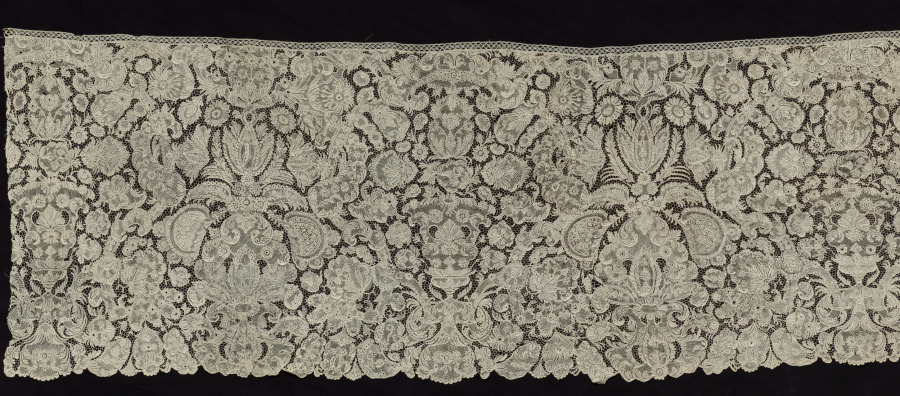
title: Lace Panel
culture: France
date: 1740–50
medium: Silk or cotton: needle lace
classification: Lace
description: The motifs in this lace panel were created separately and then joined with plaits and picot filling.